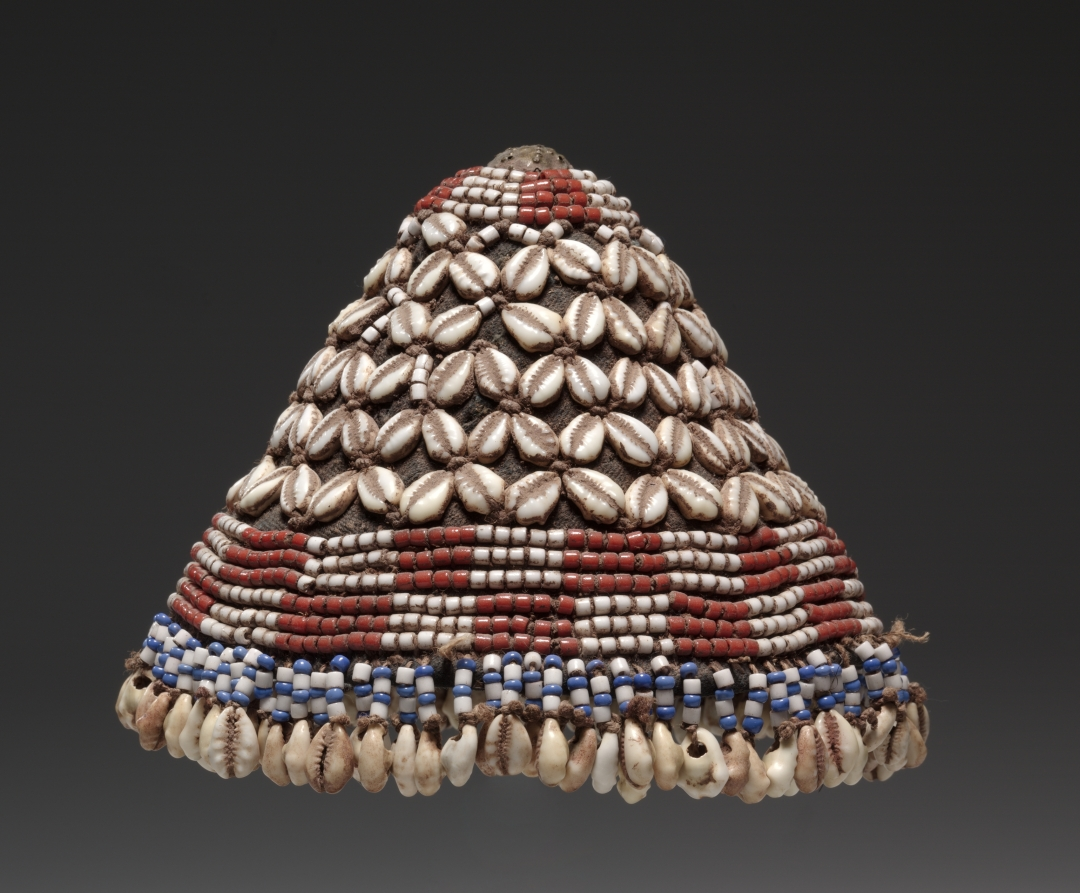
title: Cap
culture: Africa, Central Africa, Democratic Republic of the Congo, Kuba-style maker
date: early 1900s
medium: Plant fibers, cloth, glass beads, cowrie shells, and copper alloy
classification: Garment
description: Costumes worn by the Kuba king, members of his family, and the nobility are spectacular. Raffia cloth, leopard skin, feathers, beads, and cowrie shells are combined in magnificent ensembles used for specific ceremonial roles. Beaded caps of this sort are worn only by members of the royal family. When not in use, they are preserved in royal storehouses.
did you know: The beads and shells on this cap were imported from outside of central Africa.